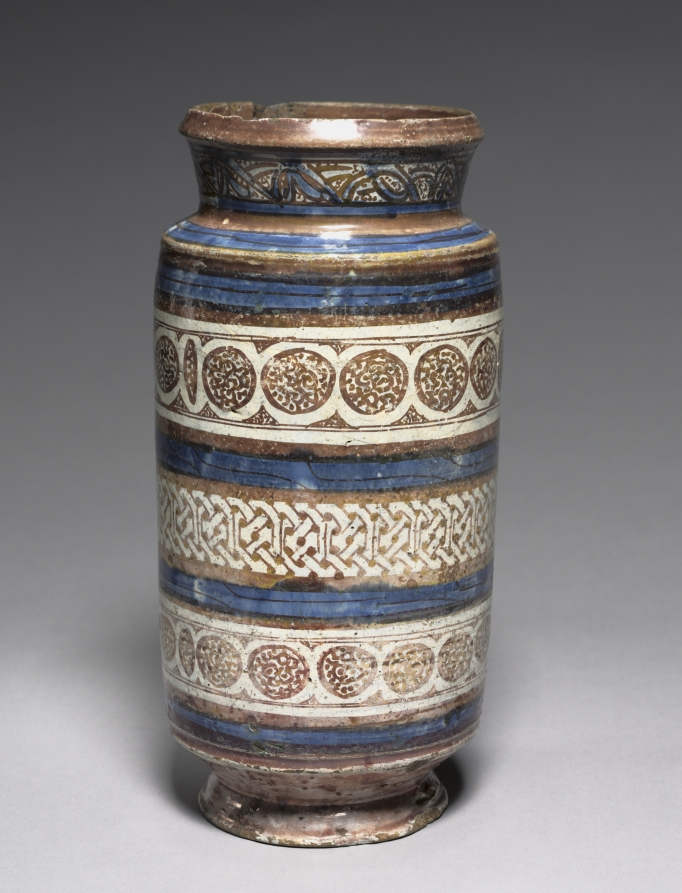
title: Albarello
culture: Spain, Manises, 15th century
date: c. 1400–1420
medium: tin-glazed earthenware, brown lustre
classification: Ceramic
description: An albarello is a type of pharmacy jar for dried medicinal herbs. The geometric ornament was inspired by contemporary Islamic designs in Muslim-occupied Spain.